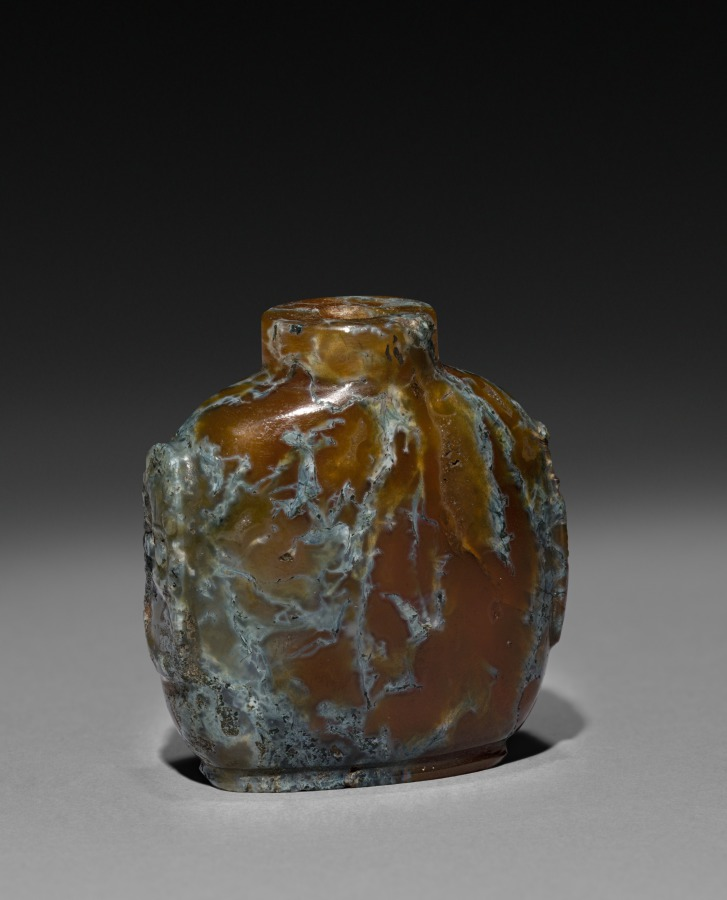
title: Snuff Bottle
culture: China, Qing dynasty (1644-1911)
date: 1644–1911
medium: glass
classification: Glass